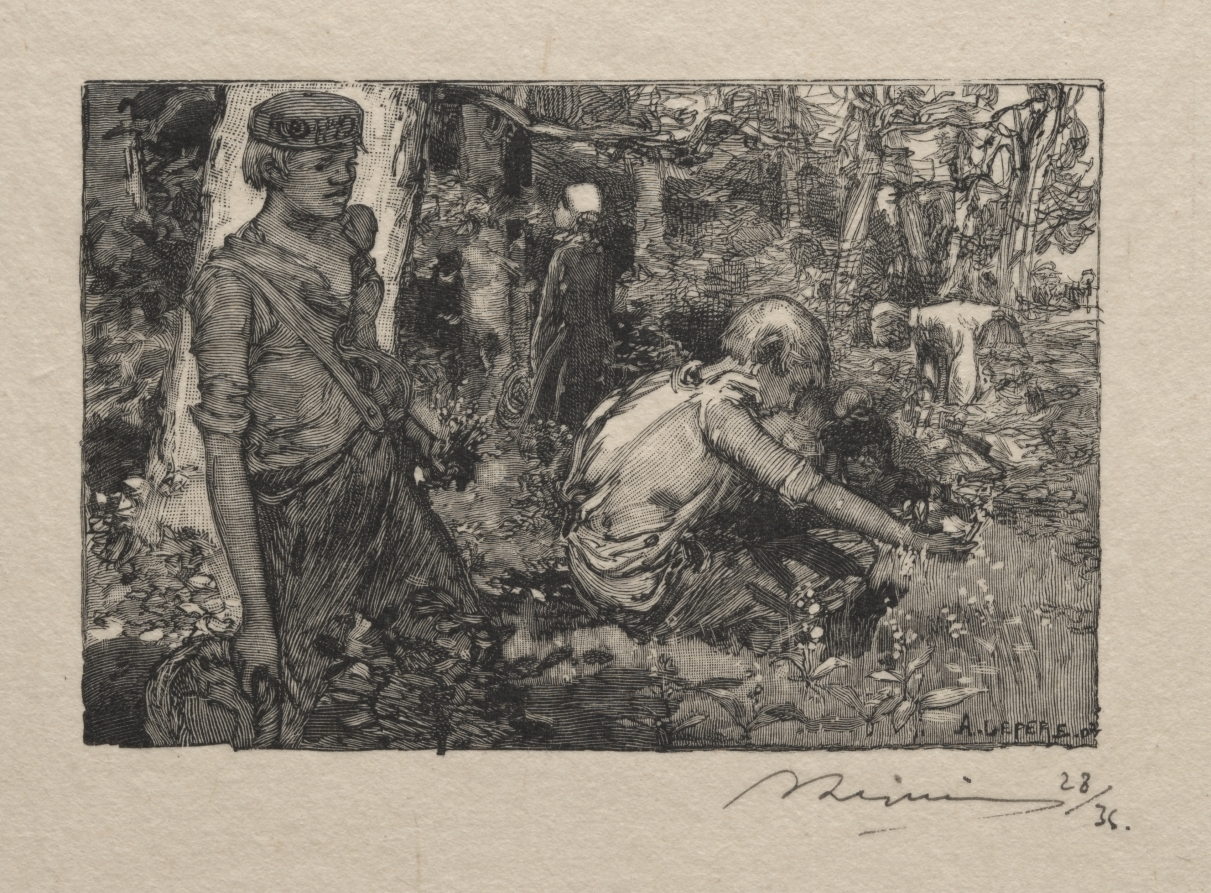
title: Cueillette du muguet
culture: France, 19th-20th century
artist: Auguste Louis Lepère (French, 1849–1918)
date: 1890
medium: wood engraving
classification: Print